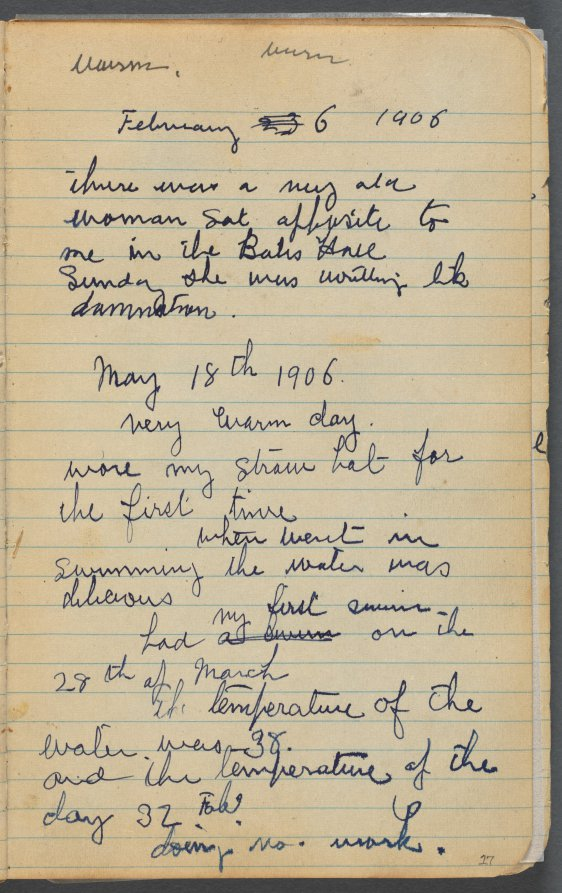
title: Sketchbook, page 017: Notes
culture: America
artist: Maurice Prendergast (American, born Newfoundland [now Canada], 1858–1924)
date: 1905–10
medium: graphite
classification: Bound Volume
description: This sketchbook contains 69 pages of drawings, a diary largely devoted to the state of the artist's health, and a three-page discourse on the nature of genius and ideas.